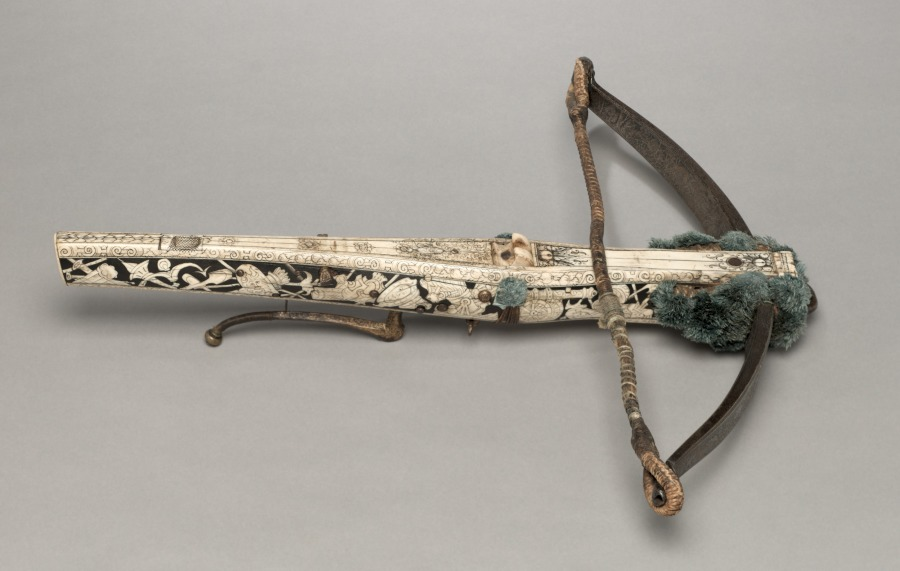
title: Crossbow and Cranequin of Elector Augustus I of Saxony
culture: Germany, Saxony, 16th century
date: c. 1553–73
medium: wood (walnut?), bone veneers, flax cord, steel (etched, traces of gilding). woolen pompoms, stock decorated wih inlaid trophies of arms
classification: Arms and Armor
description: This crossbow was a hunting weapon for Prince Elector Augustus I, a member of the ruling elite in the Holy Roman Empire. Augustus, powerful and wealthy, had even the most practical instruments ornately decorated, including this crossbow and its cranequin, or winding device.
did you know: Augustus was a marksman who took part in crossbow competitions. He had a large collection and often gave them to friends.